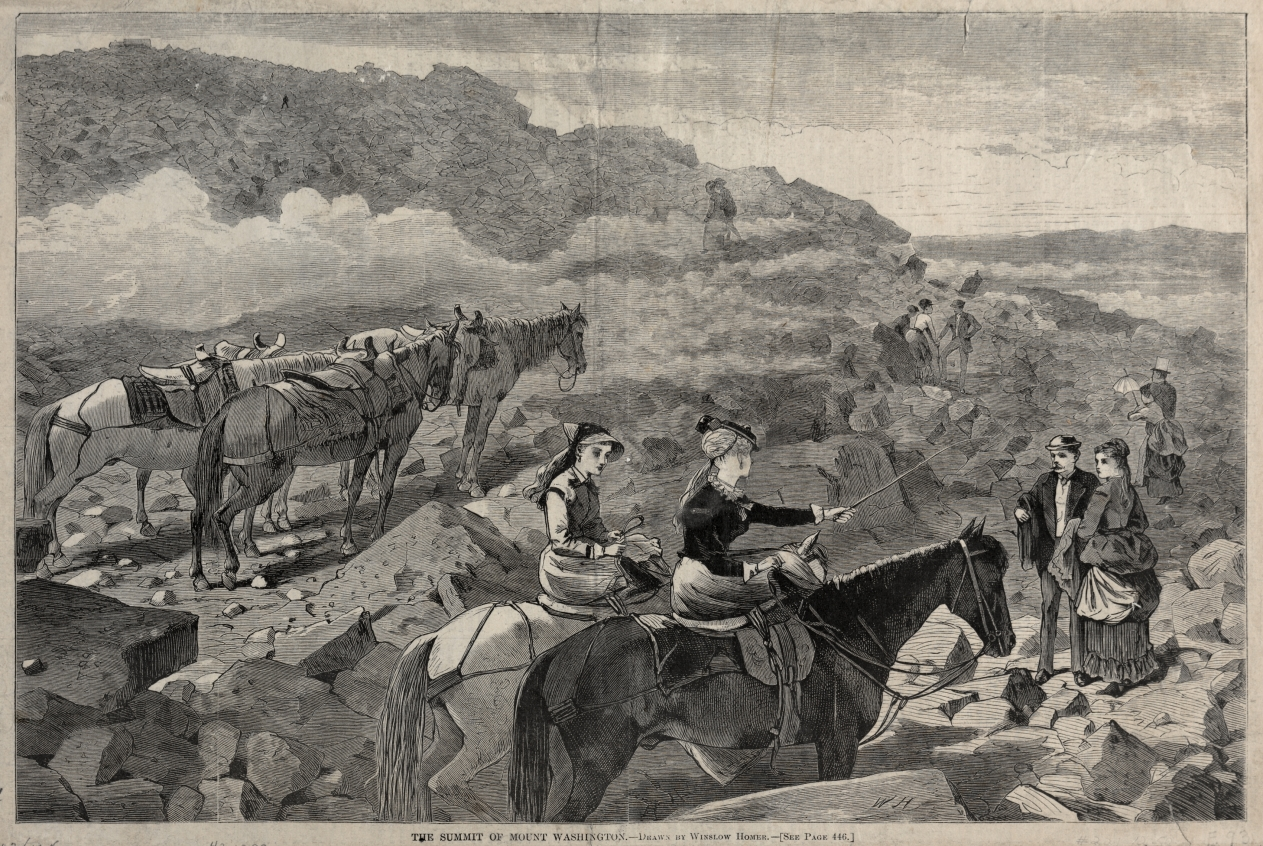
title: The Summit of Mount Washington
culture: America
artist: Winslow Homer (American, 1836–1910)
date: 1869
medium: wood engraving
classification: Print